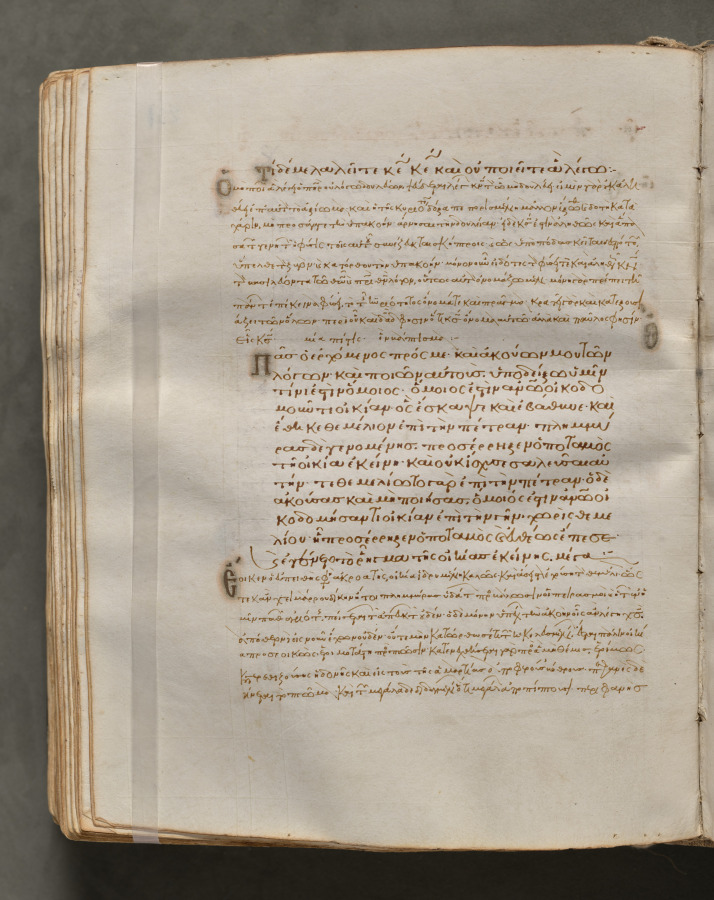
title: Text, folio 231 (verso), from a Gospel Book with Commentaries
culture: Byzantium, Constantinople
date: c. 1000–1100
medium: ink, tempera, and gold on vellum; leather binding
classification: Bound Volume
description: Each of the four gospels in this book opens on a page with brilliantly illuminated borders depicting the author of the text as well as birds—principally peacocks, symbols of the immortality of the soul—and fountains, representing the fountain of life and the salvation of the soul. This volume consists of 428 leaves with texts in Greek. Its level of sophistication suggests that it was probably written and decorated in a monastery in Constantinople.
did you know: Gospel books were carried in procession through Byzantine churches.